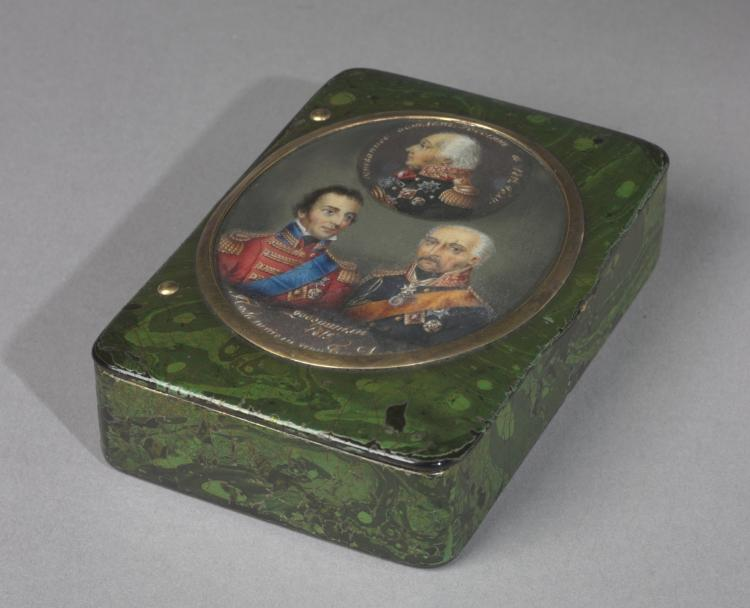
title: Box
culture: Russia, possibly Korobov Factory, early 19th century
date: c. 1815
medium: lacquered wood with painted miniature under glass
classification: Miscellaneous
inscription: Cyrillic inscriptions around miniature portraits, included in the inscriptions are the dates "1812" and "1815."